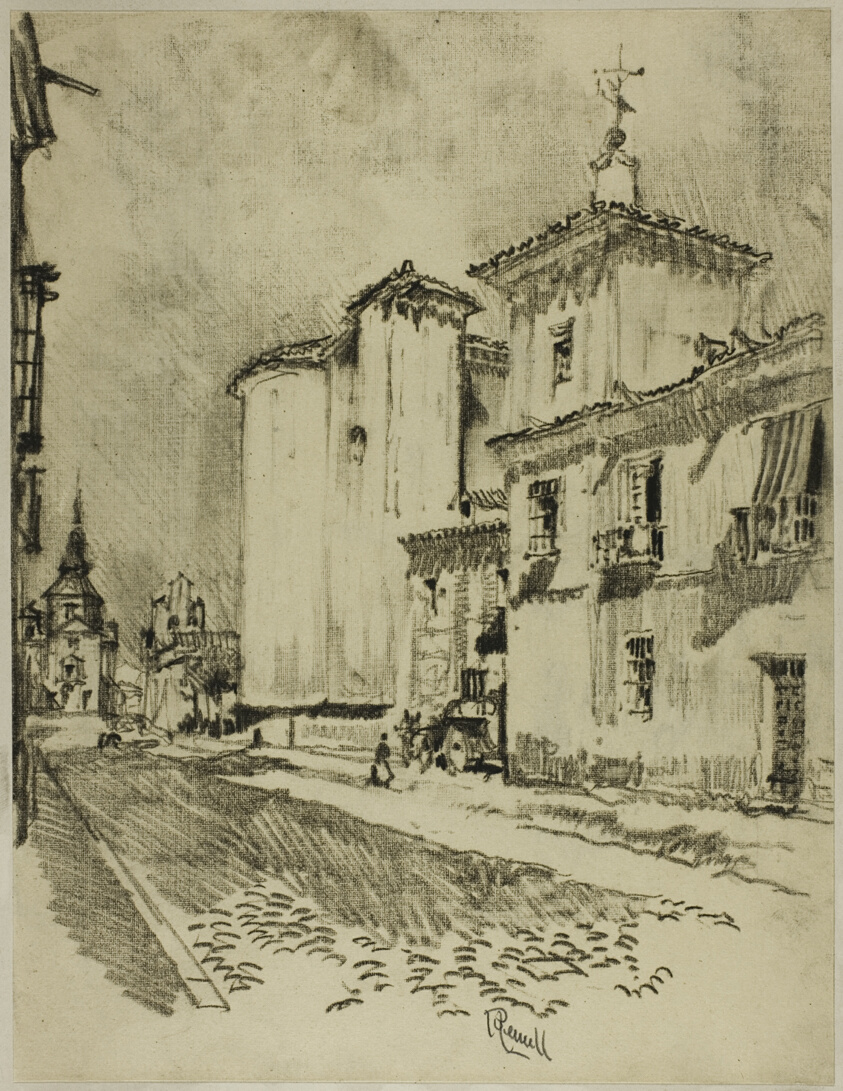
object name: Drawing and Watercolor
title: Tall and Stately Churches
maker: Joseph Pennell (American, 1857-1926)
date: c. 1903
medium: Oiled charcoal with stumping, on cream wove paper, perimeter mounted on off-white wood pulp laminate board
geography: United States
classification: charcoal; drawings (visual works); prints and drawing